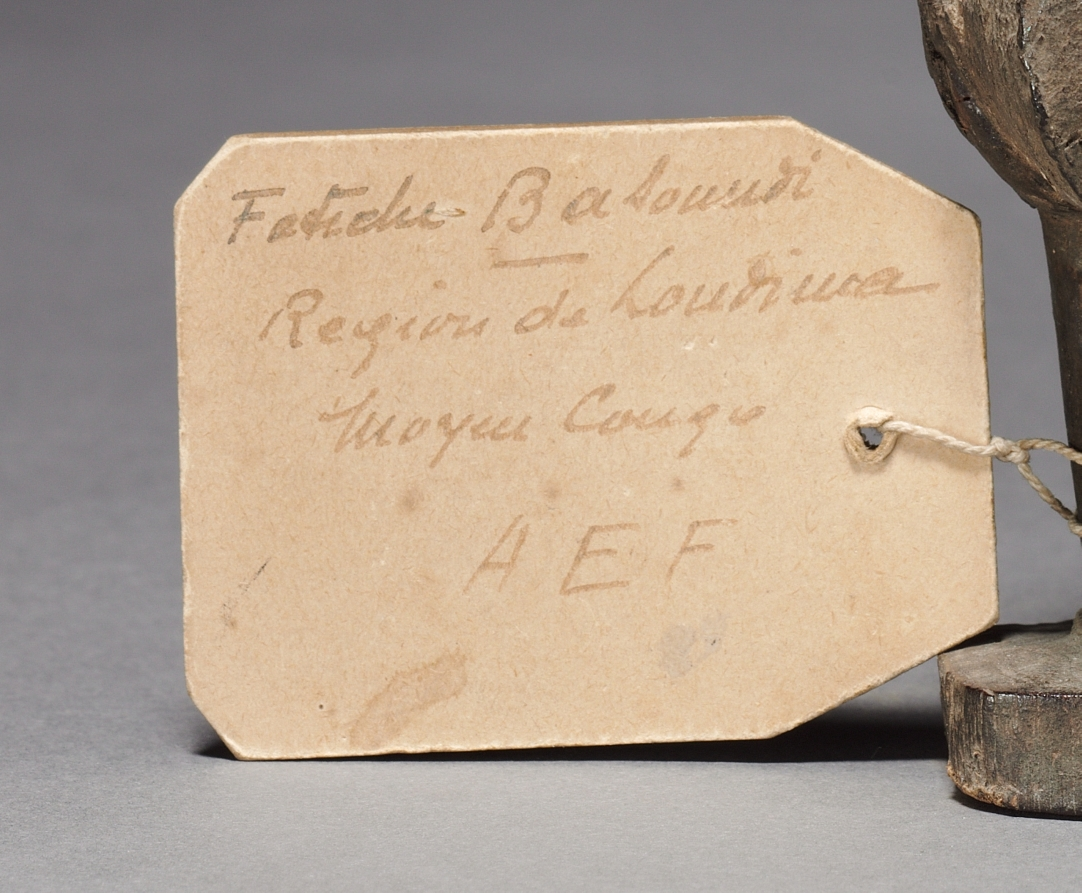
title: Power figure (nkisi)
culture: Africa, Central Africa, Republic of the Congo, Kongo-style maker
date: late 1800s-early 1900s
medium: Wood, organic materials (including resin), and metalized glass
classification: Sculpture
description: One of seven anthropomorphic figurines, these minkisi contained medicines in which an ancestral spirit was believed to reside. The medicines served a metaphorical rather than literal purpose in the resolution of conflicts among Kongo people. This figure contained white- and red-colored medicine loads on its belly and back. Its pose may refer to the nkisi’s capacity to see more than others.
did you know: The nduda minkisi were loaded with gunpowder and/or medicine to protect their owners and to shoot “witches” and other enemies.